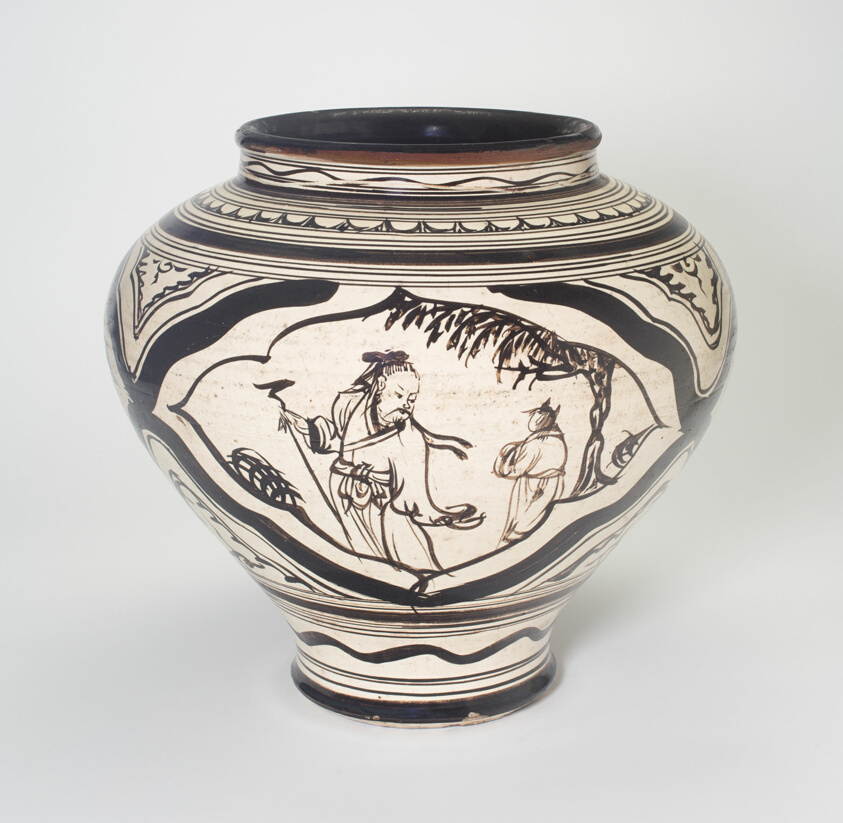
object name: Vessel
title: Vase with Figural and Floral Decoration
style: Chinese (culture or style)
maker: China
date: Yuan dynasty (1279–1368), 14th century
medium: Cizhou ware; stoneware, slip-coated with overglaze painted decoration in iron brown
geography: China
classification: vase; vessel; stoneware; asian art; ceramics